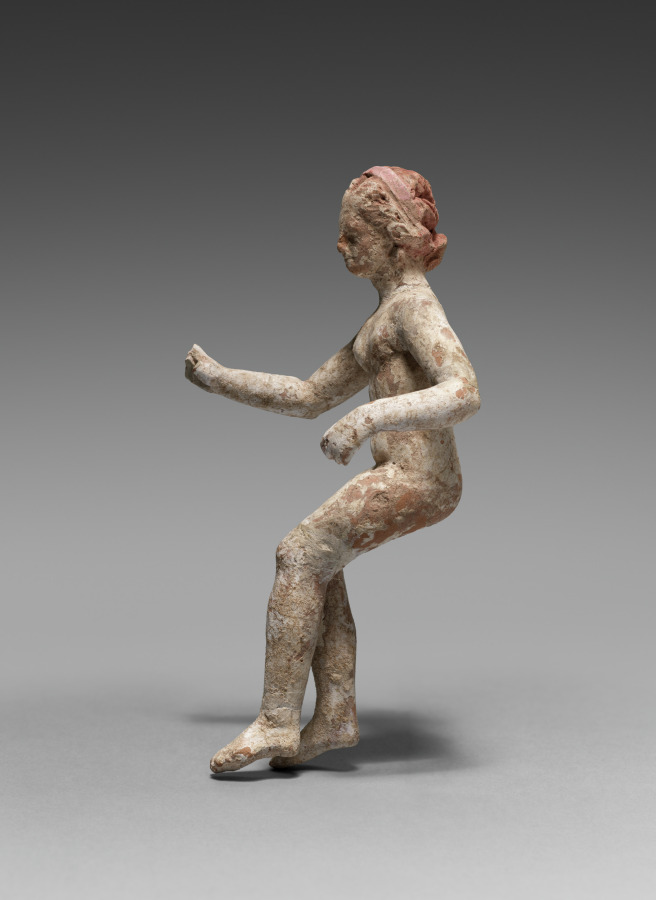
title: Figurine of a Nude Woman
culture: Greece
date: 400–200 BCE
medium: terracotta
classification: Sculpture